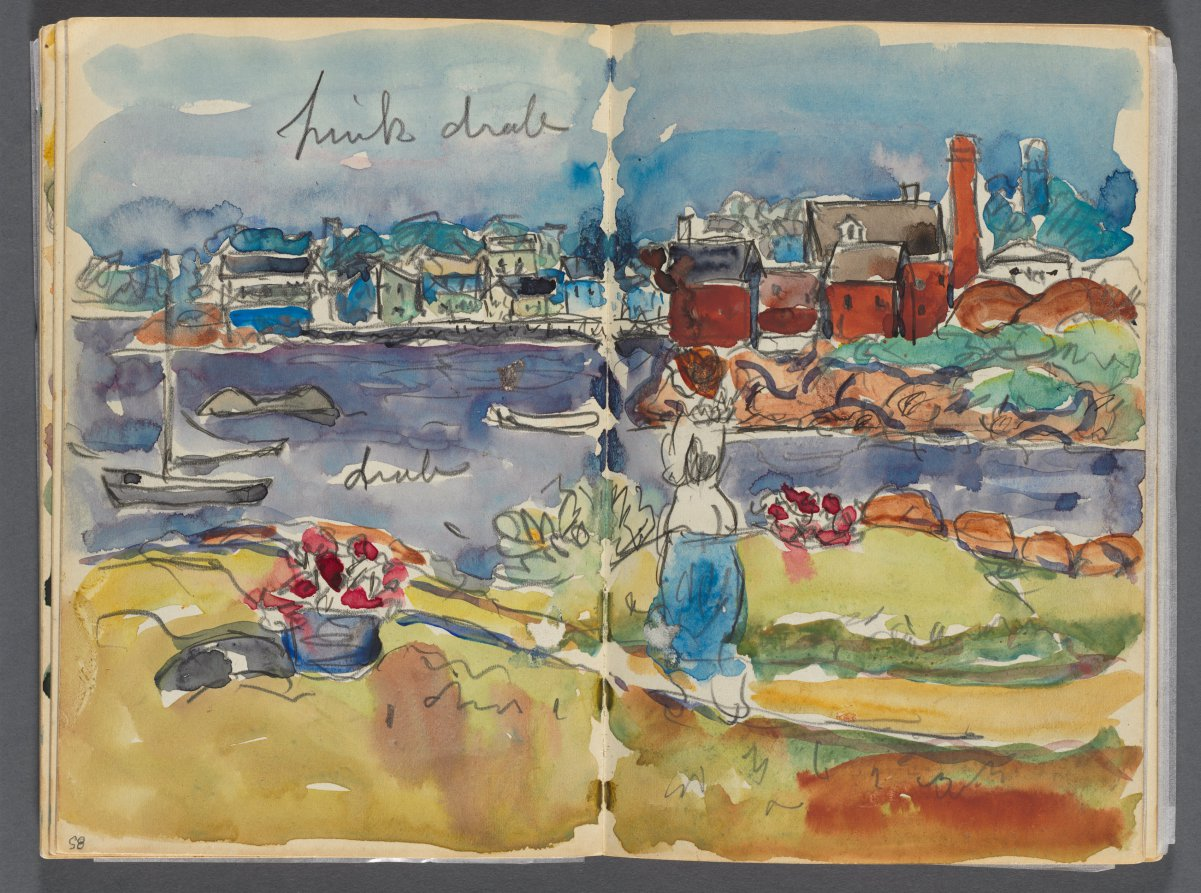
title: Sketchbook- The Granite Shore Hotel, Rockport, page 084 & 85: Harbor View with Color Notations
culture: America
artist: Maurice Prendergast (American, born Newfoundland [now Canada], 1858–1924)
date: 1905–10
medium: graphite and watercolor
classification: Bound Volume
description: This sketchbook contains 72 pages of pencil drawings and 9 watercolors of Cape Ann. On the inside of the cover Prendergast wrote the address of the Granite Shore Hotel in Rockport, Massachusetts.